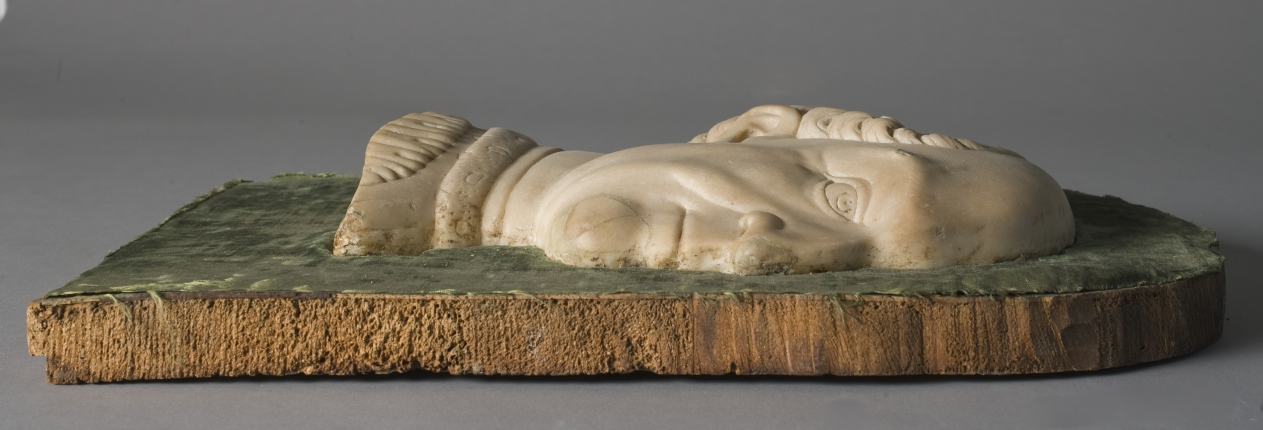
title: Portrait of Francesco Sforza and Frame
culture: Italy, Lombardy, 15th century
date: 1450–1499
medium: marble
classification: Sculpture